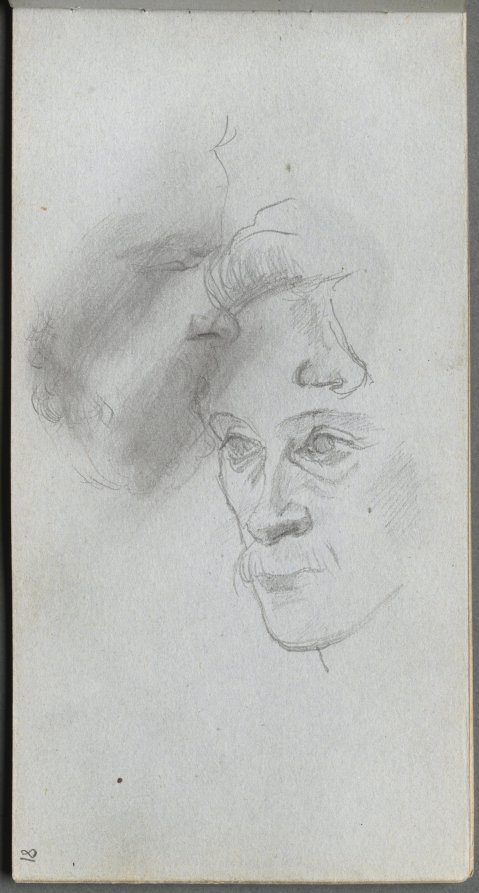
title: Sketchbook, page 81: Study of Faces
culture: France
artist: Ernest Meissonier (French, 1815–1891)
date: c. 1860s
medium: graphite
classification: Bound Volume